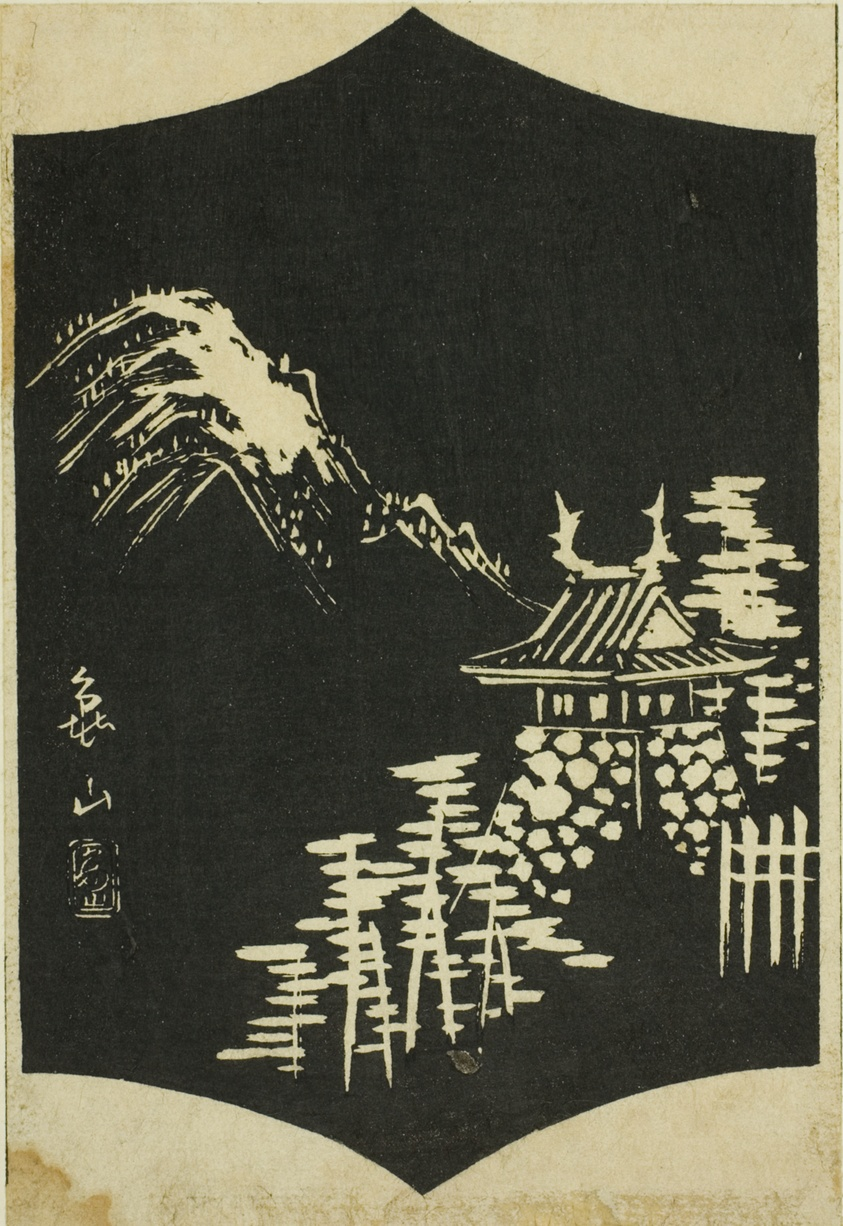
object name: Print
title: Kameyama, section of sheet no. 13 from the series "Pictures of the Fifty-three Stations of the Tokaido (Tokaido gojusan tsugi zue)"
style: Japanese (culture or style)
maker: Utagawa Hiroshige 歌川 広重; Japanese, 1797-1858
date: 1856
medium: Color woodblock print; section of harimaze sheet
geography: Japan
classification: woodblock print; print; asian art